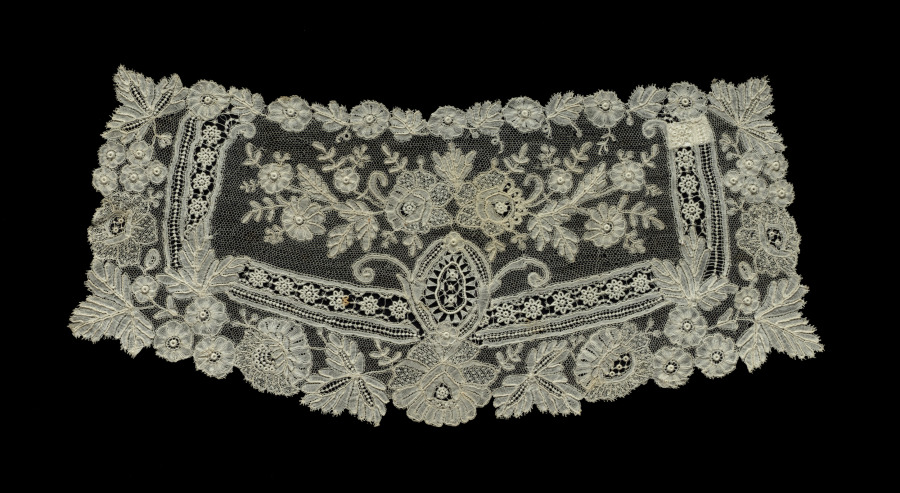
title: Lace Cuff (one of a pair)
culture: Belgium, Brussels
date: 1900–1935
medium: Linen: needle and bobbin lace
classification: Lace